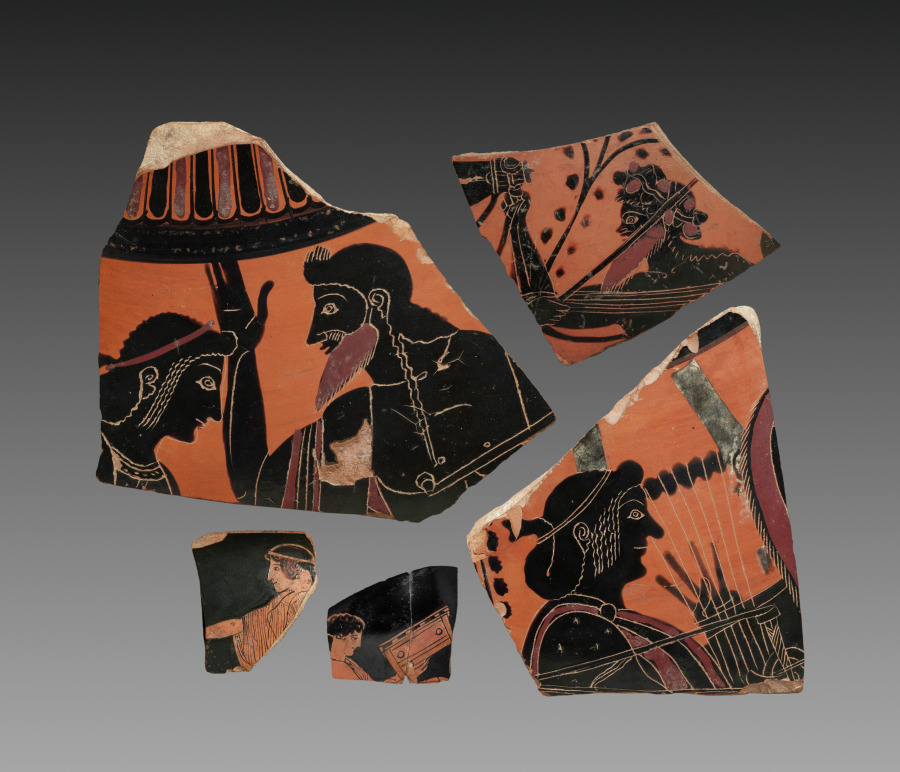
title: Five Fragments from Four Painted Vases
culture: Greek, Attic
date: c. 520–430 BCE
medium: ceramic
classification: Ceramic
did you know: These five fragments entered the collection together but derive from four different vessels. See individual records for more information.